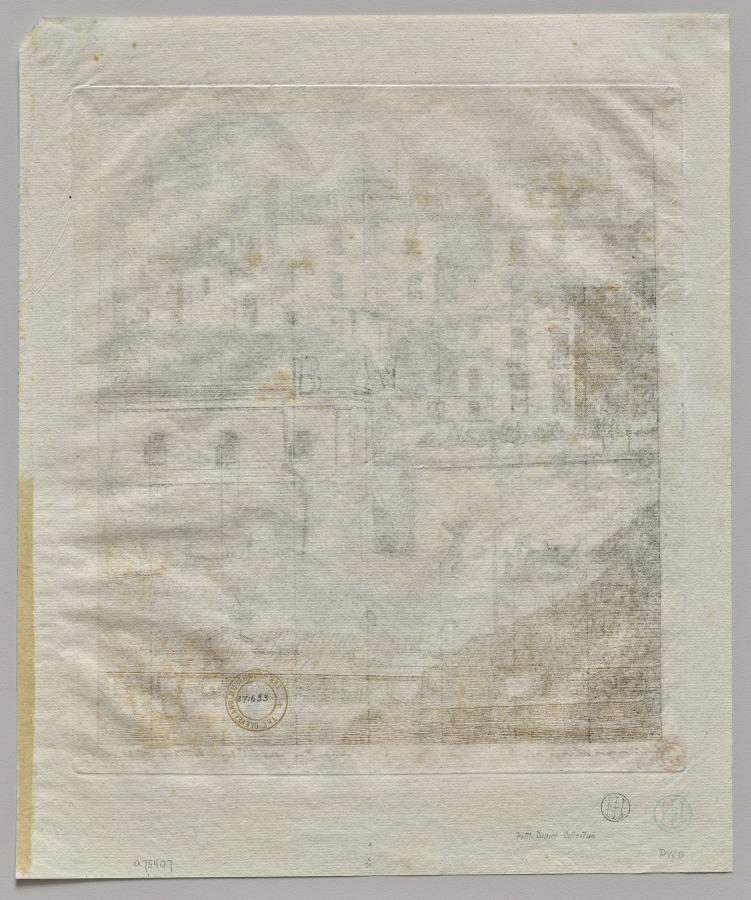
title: The Mortuary, Paris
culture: France, 19th century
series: Etchings of Paris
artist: Charles Meryon (French, 1821–1868)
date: 1854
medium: etching and drypoint on cream laid paper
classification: Print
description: Charles Meryon used etching—a technique that involves drawing on a printing plate with a needle’s point—to create minutely detailed images of Paris that imaginatively present recognizable sites. This print features bateaux-lavoirs (wash boats) on the Seine River, where laundresses could purchase a spot to do their washing. The boats appealed to Meryon, who was fascinated by Paris’s gradual transformation. Since they attracted crowds of working-class women, administrators considered the boats unsightly and unhygienic, repeatedly pushing them closer to the city’s outskirts until few remained by the end of the 1800s.